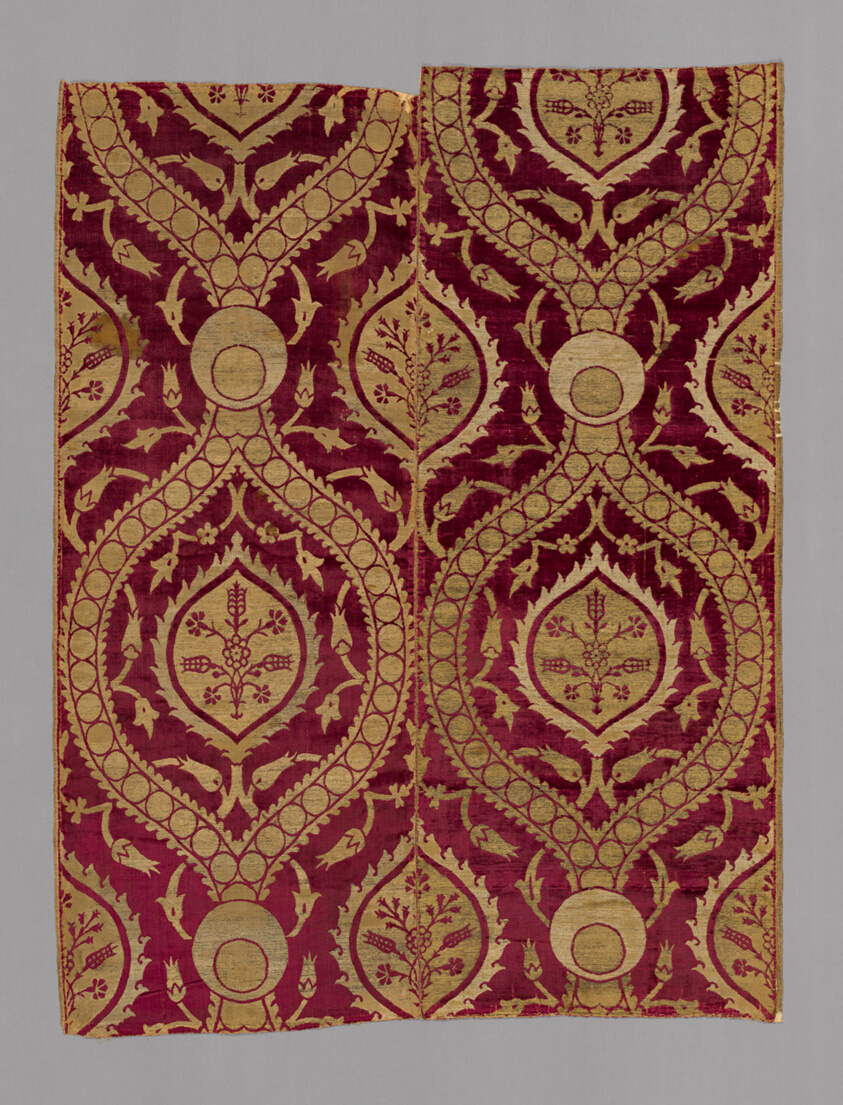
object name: Textile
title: Panel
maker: Turkey, Bursa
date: 1550/1600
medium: Silk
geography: Turkey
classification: textile; weaving - velvet